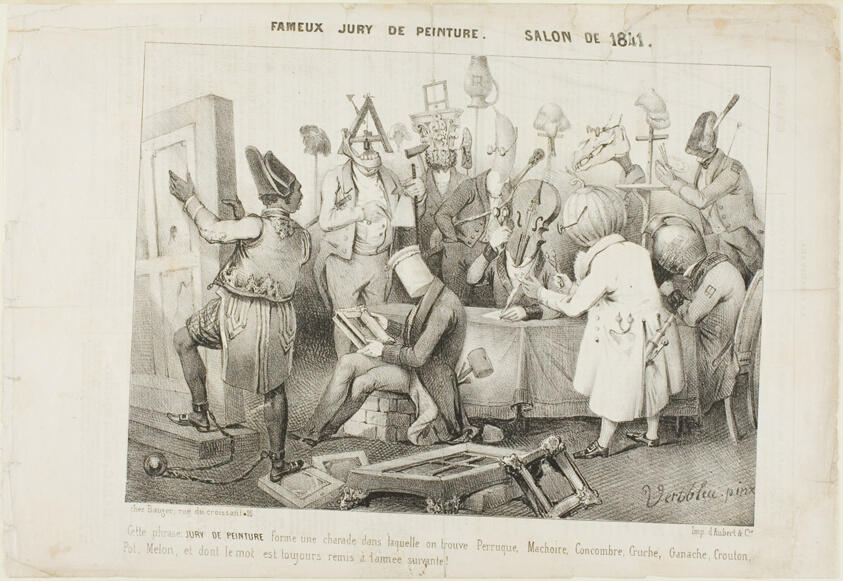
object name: Print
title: Fameux Jury de Peinture. Salon de 1841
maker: Clément Pruche (French, active 1831-1870); printed by Imprimerie d'Aubert et Cie; printed and published by chez Bauger et Cie; published in Le Charivari (French, 1832-1915)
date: 1840, reissued 1841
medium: Lithograph, with scraping on stone, in black on ivory wove paper, with letterpress on verso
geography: France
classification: lithograph; print; prints and drawing